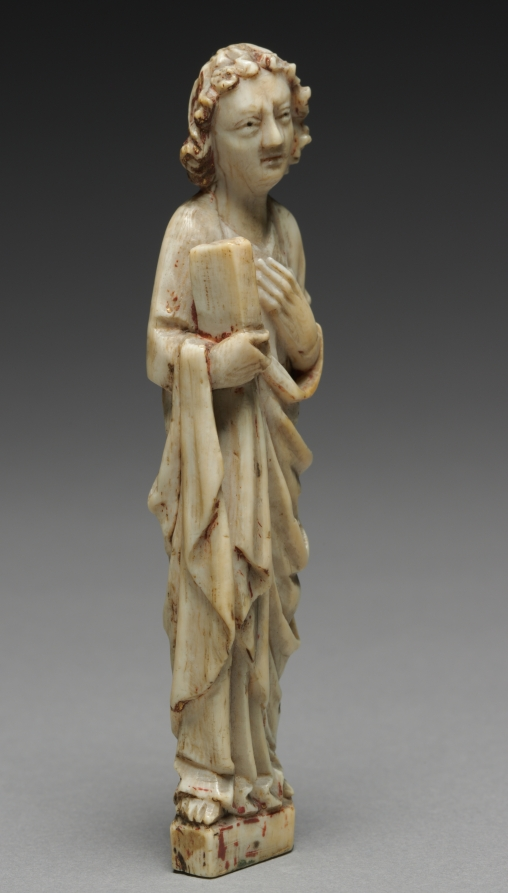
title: Saint John the Evangelist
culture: Germany or Moravia, 14th century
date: c. 1325–1330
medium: ivory with traces of paint and gilding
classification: Ivory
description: This figure with a Virgin and Crucified Christ (now lost) formed a Crucifixion group within a shrine.